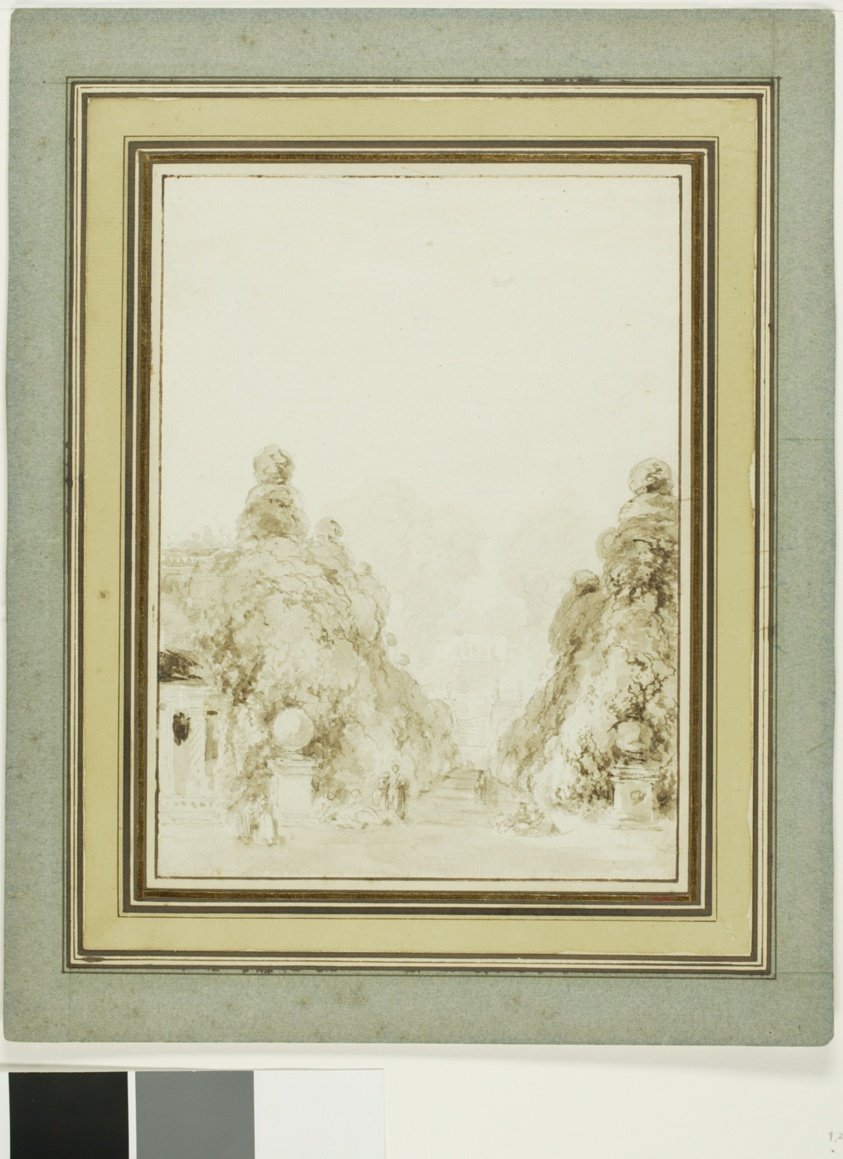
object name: Drawing and Watercolor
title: View of the Park in Saint-Cloud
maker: Jean-Honoré Fragonard; French, 1732-1806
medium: Brush and brown ink and brown wash, over traces of graphite, on ivory laid paper, laid down on cream laid card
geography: France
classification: pen and ink drawings; drawings (visual works); prints and drawing